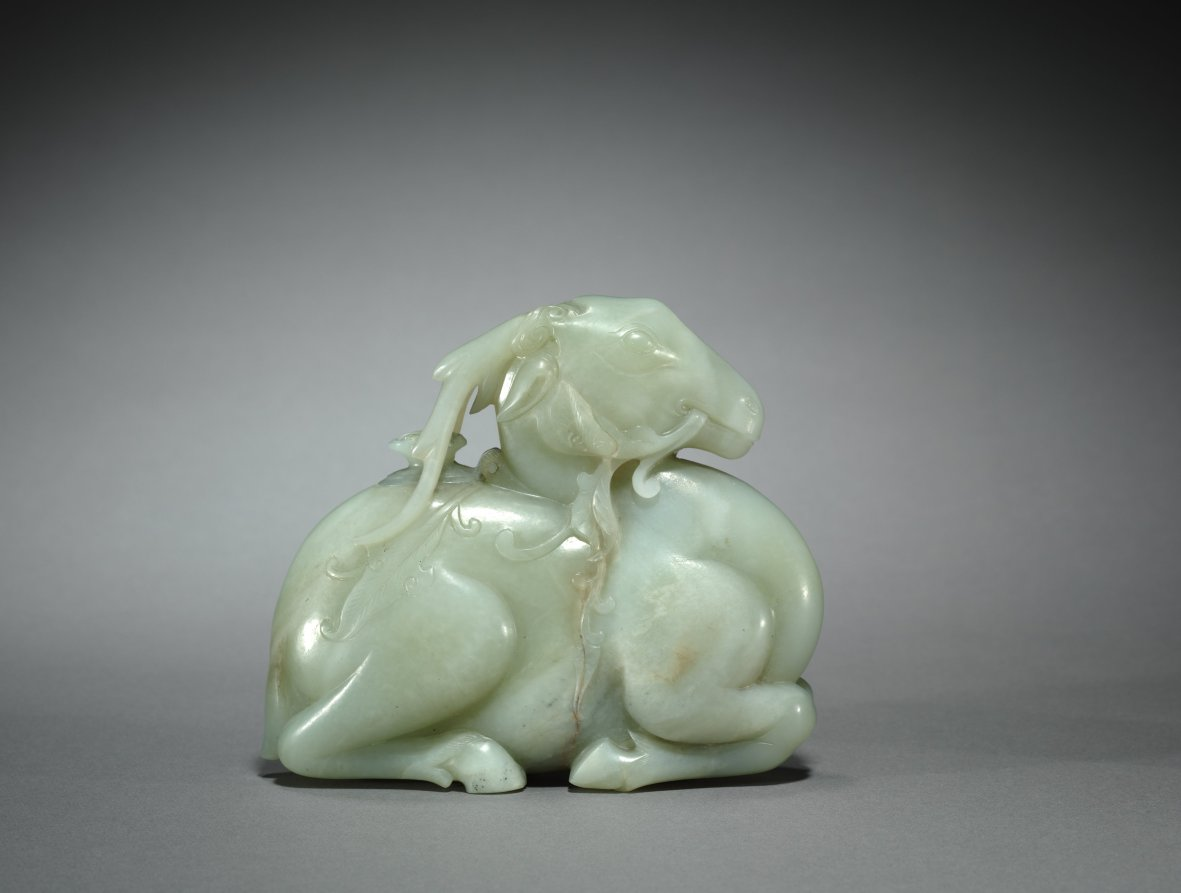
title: Jade Recumbent Deer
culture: China, Qing dynasty (1644–1911)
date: 1700s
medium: pale gray-green jade with brown markings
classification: Jade